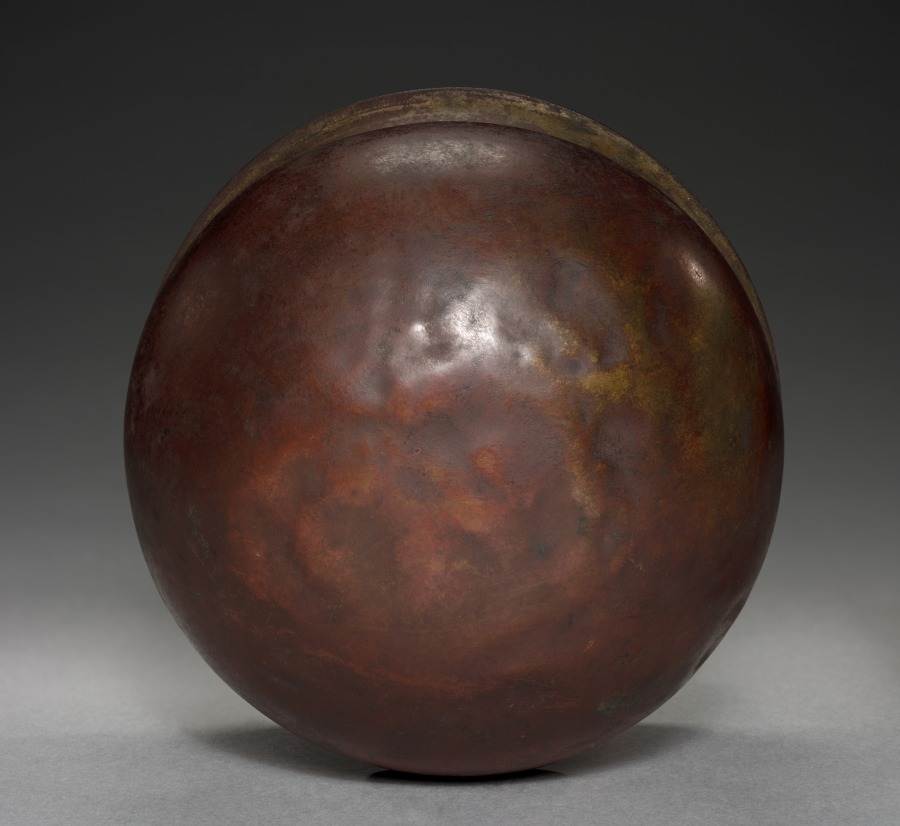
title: Deep Bowl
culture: Egypt, Greco-Roman period (332 BCE–395 CE), Ptolemaic dynasty (305–30 BCE) or modern forgery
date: 305–30 BCE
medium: bronze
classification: Vessels